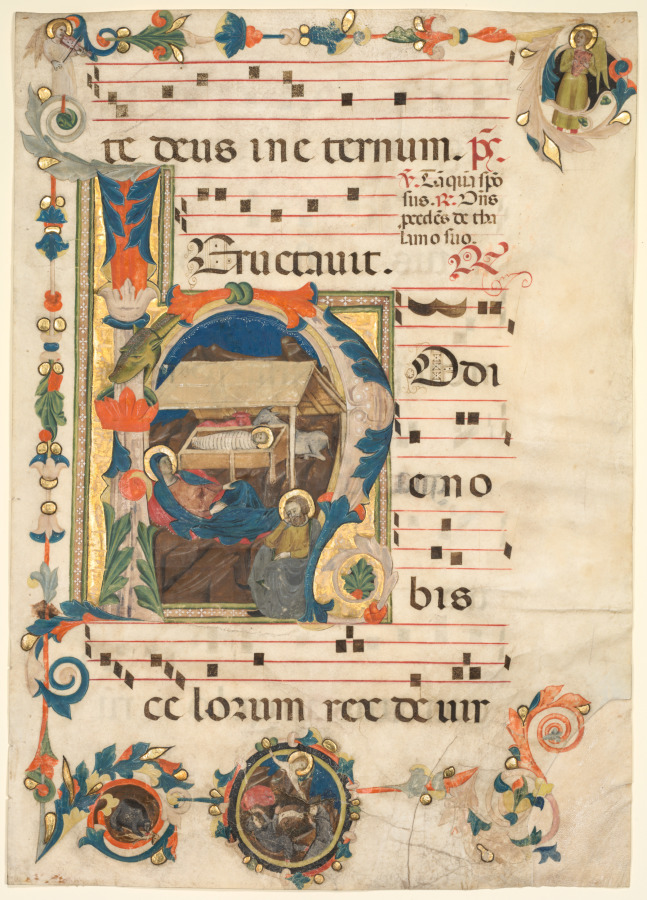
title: Leaf from an Antiphonary with Historiated Initial (H) with The Nativity (recto)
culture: Italy, Tuscany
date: early 1300s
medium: ink, tempera, and gold on parchment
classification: Manuscript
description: This enormous initial h illustrates the beginning of the text of the first matins response for Christmas Day: Hodie nobis celorum rex (“On this day the King of Heaven”). The initial is appropriately decorated with a scene of Christ’s nativity. Along with other painters and illuminators, Neri da Rimini established the school of Rimini, characterized by a painting style owing much to the work of Giotto, who he perhaps encountered in Padua.